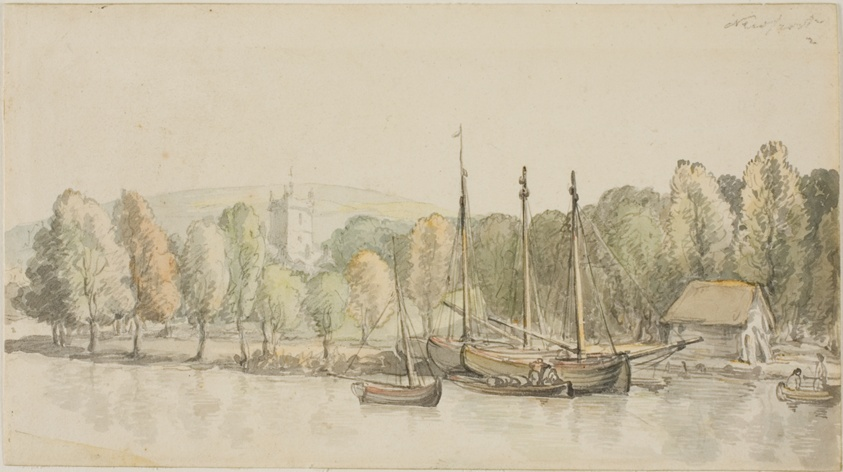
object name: Drawing and Watercolor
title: Newport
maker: Thomas Rowlandson (English, 1756-1827)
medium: Watercolor, over graphite, on ivory wove paper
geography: England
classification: watercolor; drawings (visual works); prints and drawing